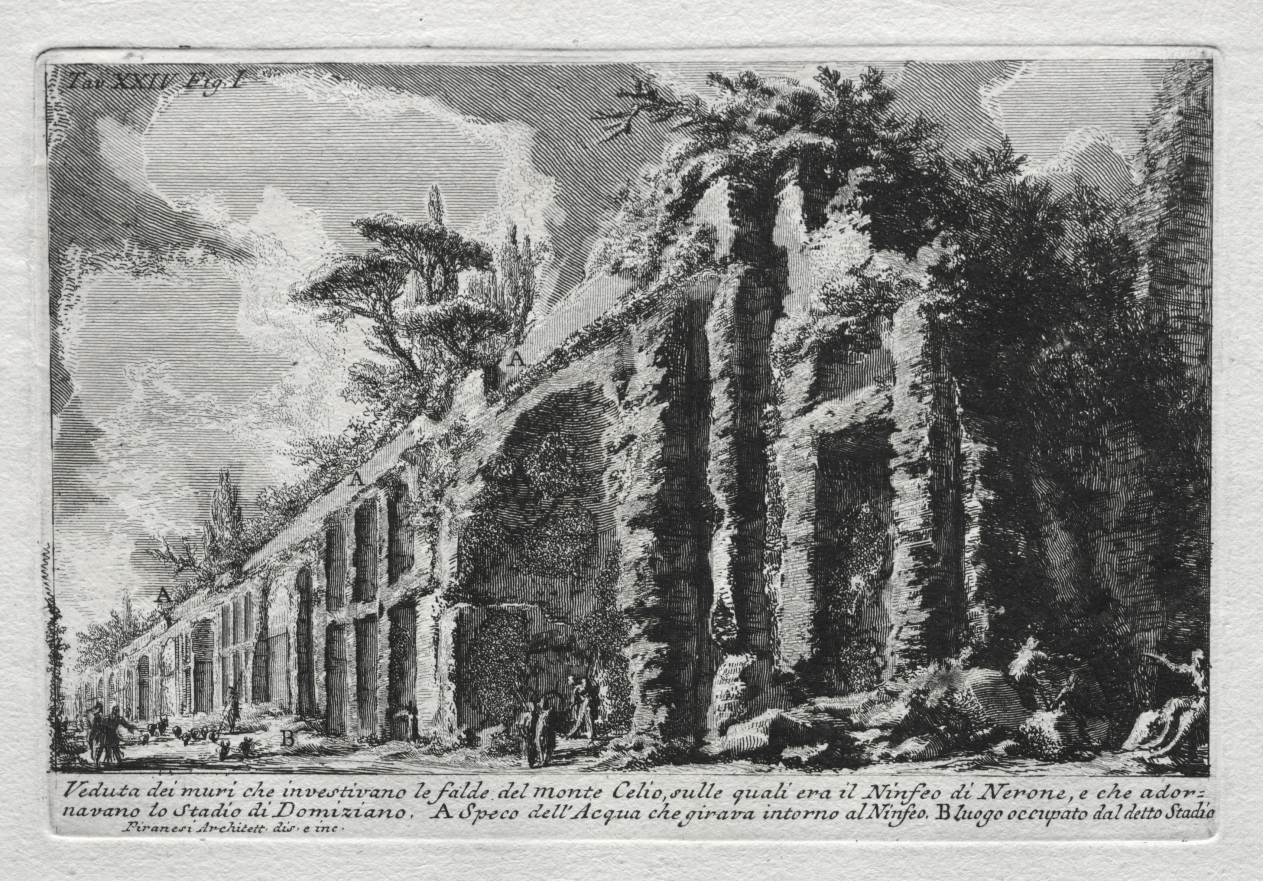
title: Veduta dei muri che investivano le falde del Monte Celio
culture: Italy, 18th century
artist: Giovanni Battista Piranesi (Italian, 1720–1778)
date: 1750s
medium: etching and engraving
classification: Print